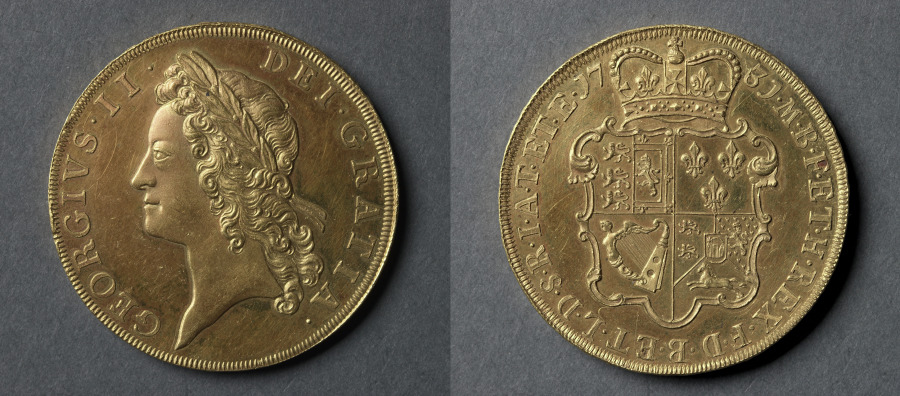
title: Five Guineas: George II (obverse); Shield of Arms (reverse)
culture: England, George II, 1727-1760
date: 1731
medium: gold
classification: Coins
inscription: GEORGIVS . II . DEI . GRATIA .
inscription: M.B.F.E.T.H.REX.F.D.B.ET.L.D.S.R.I.A.T.ET.E.1731.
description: This coin was probably struck as a proof. Under George II the same denominations of coinage appeared as in previous reigns since the coinage reform of 1662. The elephant, or elephant and castle no longer appear on the obverse. In 1729 the initials E I C appeared below the head on some of the five guineas, and on the guinea and half guinea of other dates. These signify that the coins were struck for the East India Company, or from gold sent by that company for coining at the Royal Mint.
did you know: The shield shows from top right to bottom left: England and Scotland, France, Ireland, and the Electorate.